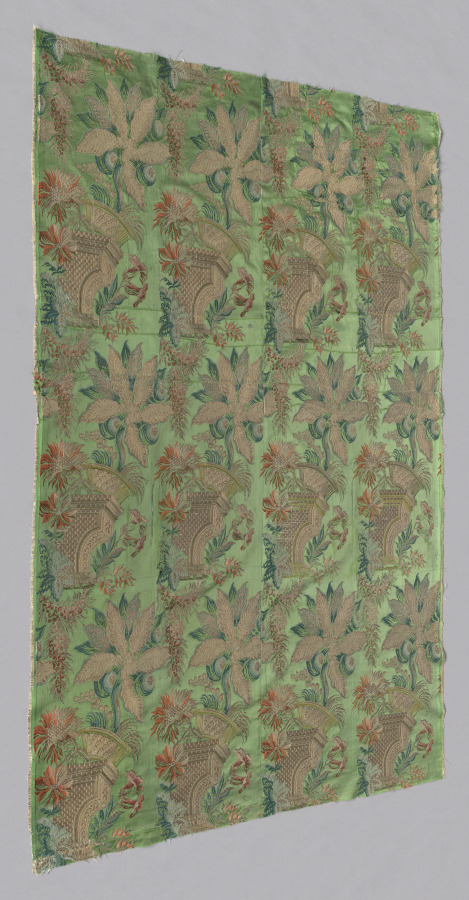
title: Silk Brocade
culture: Italy, Venice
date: late 1600s - early 1700s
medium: brocade; silk and metal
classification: Textile